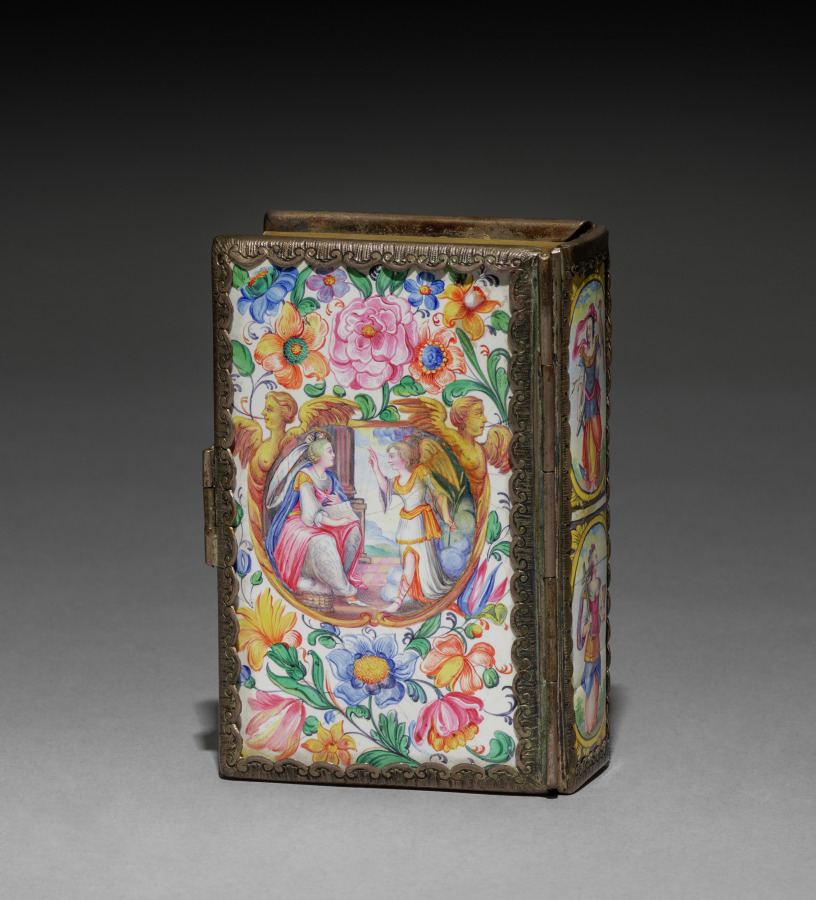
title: Carnet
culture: Sweden, 19th century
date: 1863–1865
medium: enamel on copper and silver gilt book binding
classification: Miscellaneous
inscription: inside is psalm book written in German, with handwritten dedication on cover, dated 25 May 1865.